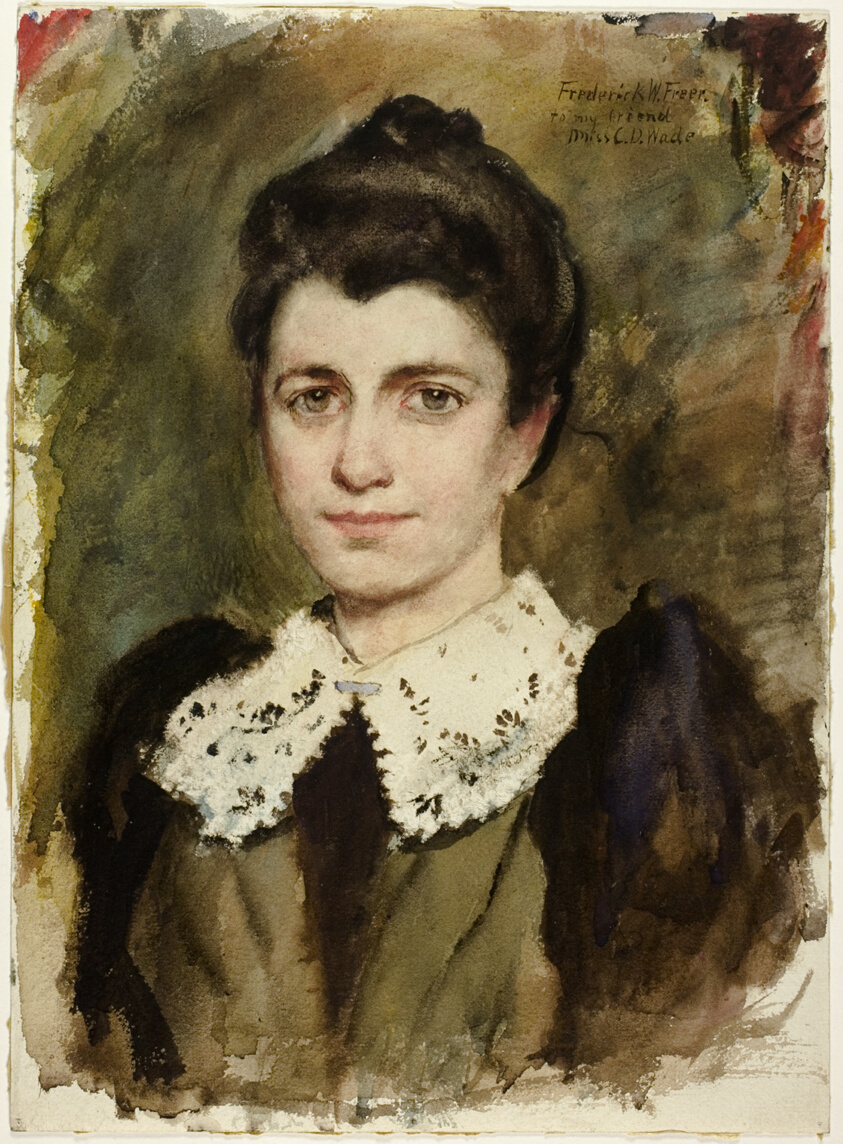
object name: Drawing and Watercolor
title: Caroline D. Wade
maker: Frederick Warren Freer (American, 1849-1908)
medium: Watercolor with scraping on ivory wove paper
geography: United States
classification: watercolor; drawings (visual works); prints and drawing